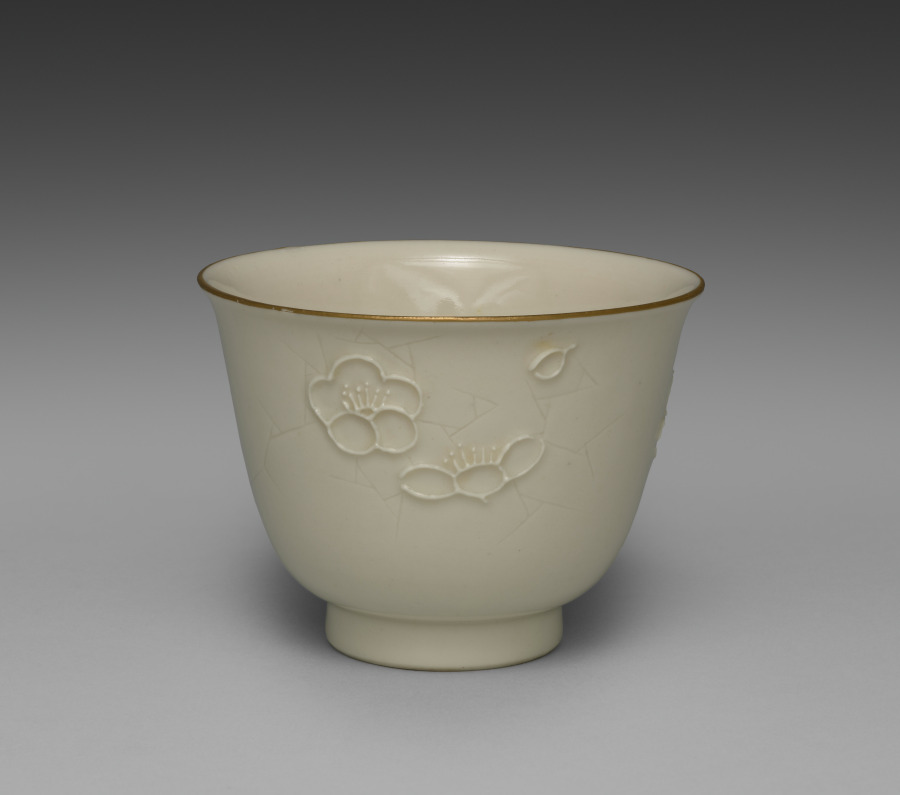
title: Drinking Cup from Dining Set with Plum Blossoms and Cracked-Ice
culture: Japan, Meiji period (1868–1912)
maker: Seifū Yohei II (Japanese, 1844–1878)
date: c. 1875–78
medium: Porcelain with molded designs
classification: Ceramic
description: Each item in this set has a delicate low-relief design of flowering plum branches over scattered, intersecting lines meant to resemble the cracked-ice surface of a frozen body of water and is signed on the base in gold pigment. While Yohei II produced many fine works in underglaze blue, like those produced by Kiyomizu Shichibei, he also made works in quite different styles later in his career, from the early 1870 s. In 1873, he was appointed purveyor to the Industrial Center of Kyoto Prefecture, a designation associated with Kyoto’s efforts to reach an international market through the port of Kobe; and from 1875 until his death, he was involved in national-level projects to present Japanese ceramics across the world. It was during this period that Yohei III was apprenticed to Yohei II, and it has been suggested that this set may in fact be an early example of Yohei III’s work, which he signed with his teacher’s name. Decorated with flowers resembling Japanese textile motifs, the set calls to mind the design of Yohei II’s pair of vases with plum blossoms in the Victoria and Albert Museum. Here, the elaborate trees created for a formal public exhibition setting have been translated into the approachable blossoms of the genteel domestic environment. While the designs are consistent across the pieces, each raised flower petal and pistil and each incised line in the ice was done by hand, so the cups, bowls, and dishes are similar yet unique. The bottoms of two boxes once identified the set’s owner, but the information has been deliberately obscured with black ink. However, inscriptions still visible appear to indicate two occasions, once at the end of July 1886 , and once again in June 1916 , when parts of the set were requested from Hokura in Niigata Prefecture. The location corresponds to a neighborhood in the present-day city of Jōetsu. The surname Tsuji 辻 also appears on a paper tag affixed to one of the box cloths. Future research may possibly reveal more about their provenance. A vase by Yohei III in a private collection combines the formal grandeur of the Yohei II vases in the Victoria and Albert Museum with the gentler design of this dining set, placing flowering plum trees against soft, scalloped-edge clouds resembling those in golden screens.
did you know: The dining wares have a creamy white coloration that the four boxes containing them identify as Korean in style.